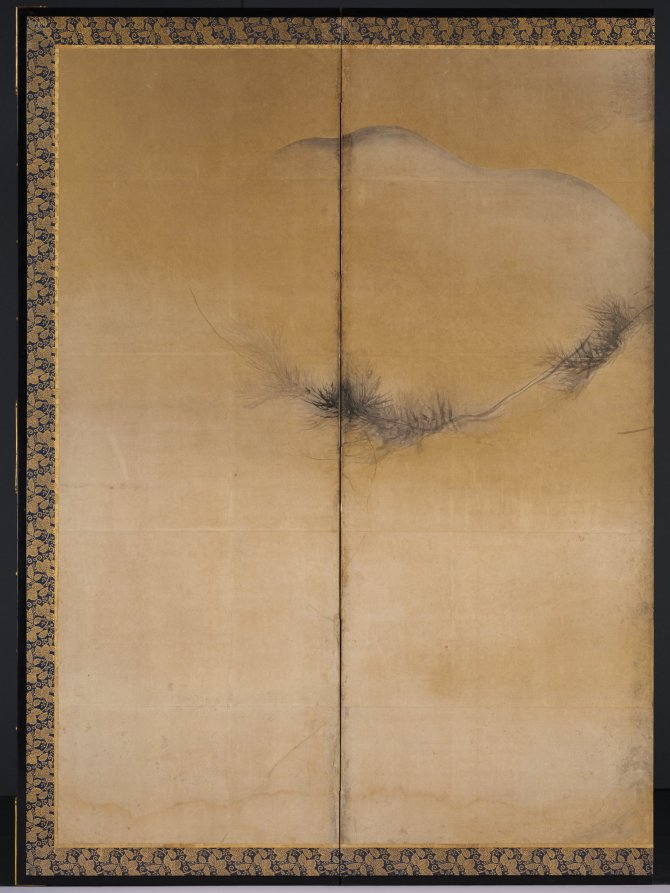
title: Winter and Summer Flowers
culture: Japan, Momoyama period (1573–1615)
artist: Kaihō Yūshō (Japanese, 1533–1615)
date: c. 1600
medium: One of a pair of six-panel folding screens; ink, color, and gold on paper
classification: Painting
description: White camellias bloom behind a large pine in the right screen and blue morning glories creep through bamboo in the left screen of this composition. The mountains and bridge suggest a continuous landscape, but the paintings actually juxtapose flowers of winter and summer, with time progressing from right to left. Kaihō Yūshō painted similar landscapes for Zen temples in Kyoto.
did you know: The pine and bamboo are defined by ink wash, but the flowers take form through color within contour lines.